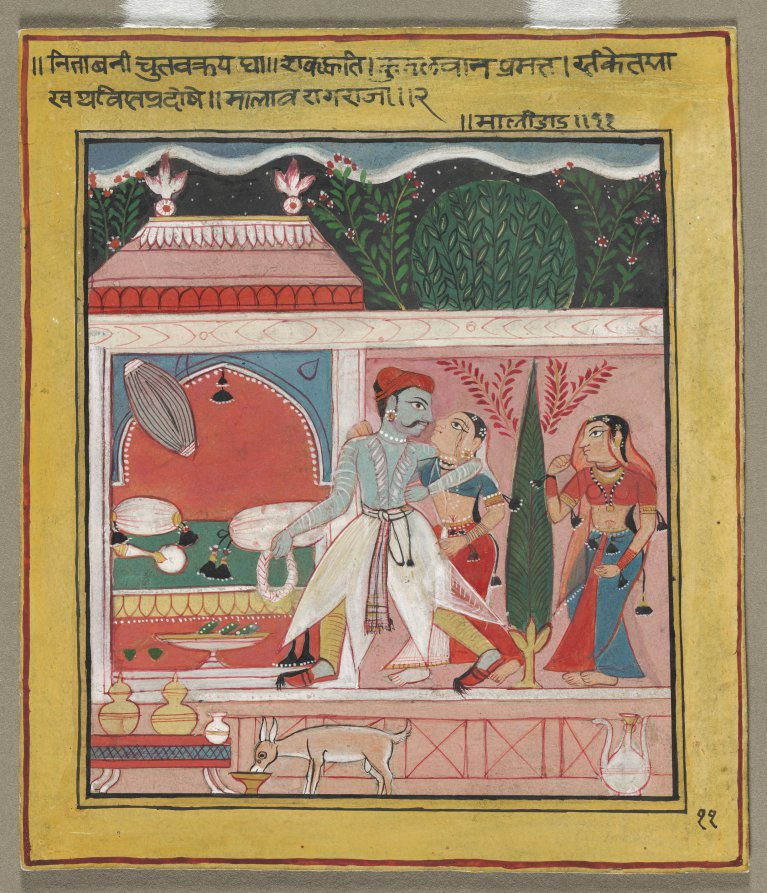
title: Ragini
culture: India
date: early to mid-1900s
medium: Gum tempera and ink on paper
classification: Painting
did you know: This painting was donated by Jaya Appasamy, artist and art critic of modern Indian art, who studied at Oberlin College for her master's degree.